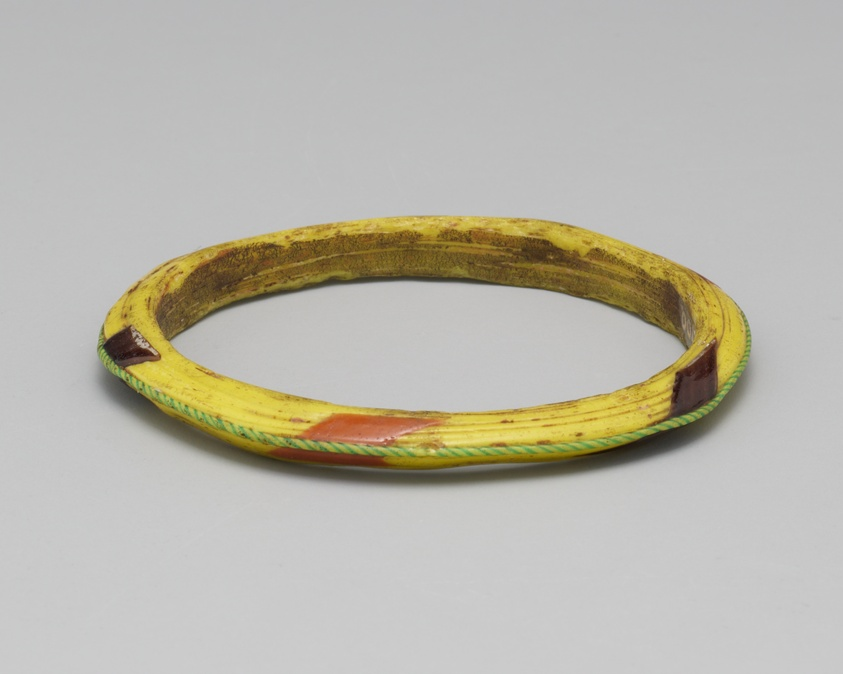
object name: Costume and Accessories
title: Bracelet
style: Islamic (culture or style)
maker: Islamic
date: 14th-15th century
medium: Glass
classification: glass; jewelry; ancient art; costume